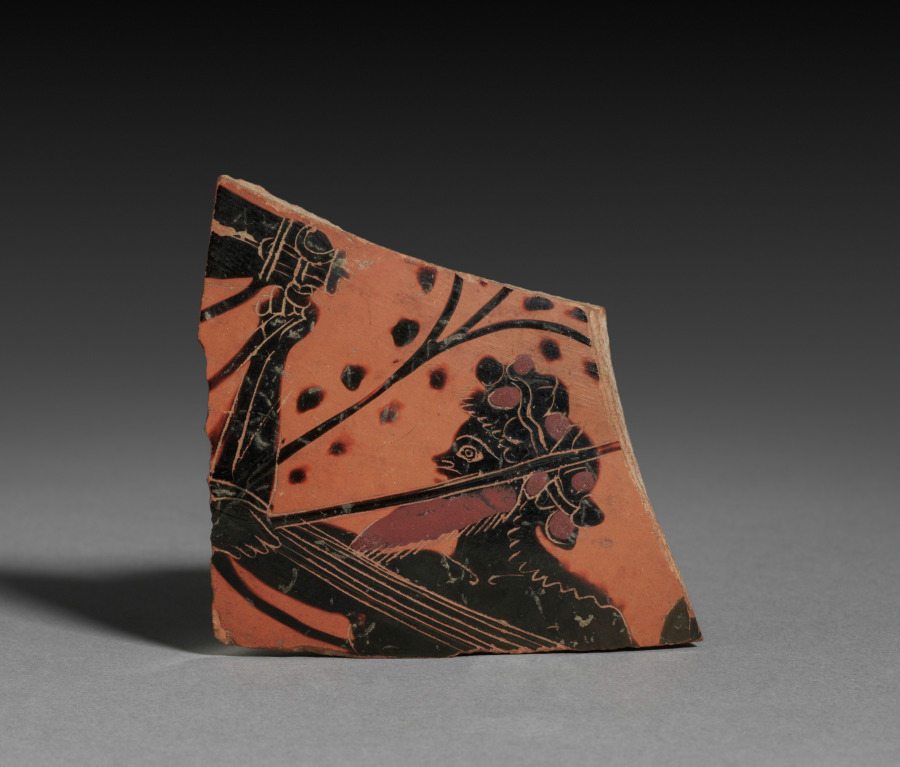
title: Fragment from Black-Figure Neck-Amphora (Storage Vessel): Satyr and Horse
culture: Greek, Attic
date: c. 520–510 BCE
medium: ceramic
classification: Ceramic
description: This small fragment preserves part of a harnessing scene. At left is part of the muzzled head of a horse, guided by a red-bearded satyr wearing a wreath. Before him are the hands of a charioteer—perhaps Dionysos—holding reins and a goad, with a branch in the background. The unfinished interior identifies this as part of a closed vessel, likely a neck-amphora.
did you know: Greek horsemen often muzzled their horses to prevent biting.